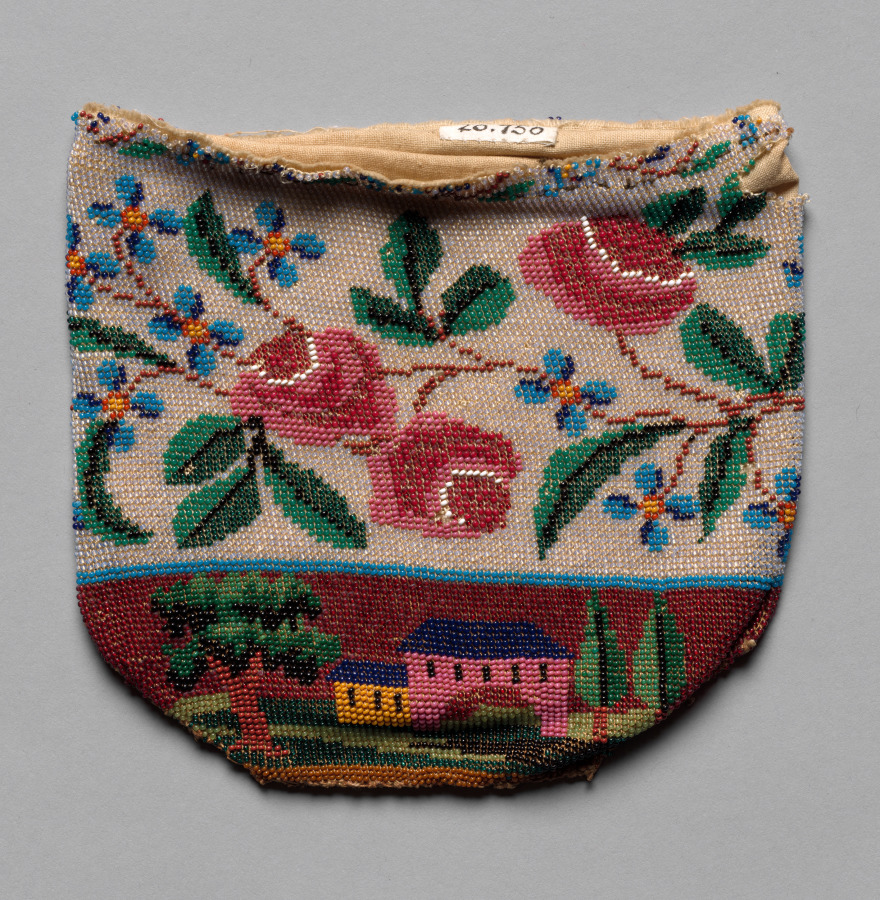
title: Beaded Bag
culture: America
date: 1800s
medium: glass beads; plain weave cotton or linen lining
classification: Garment